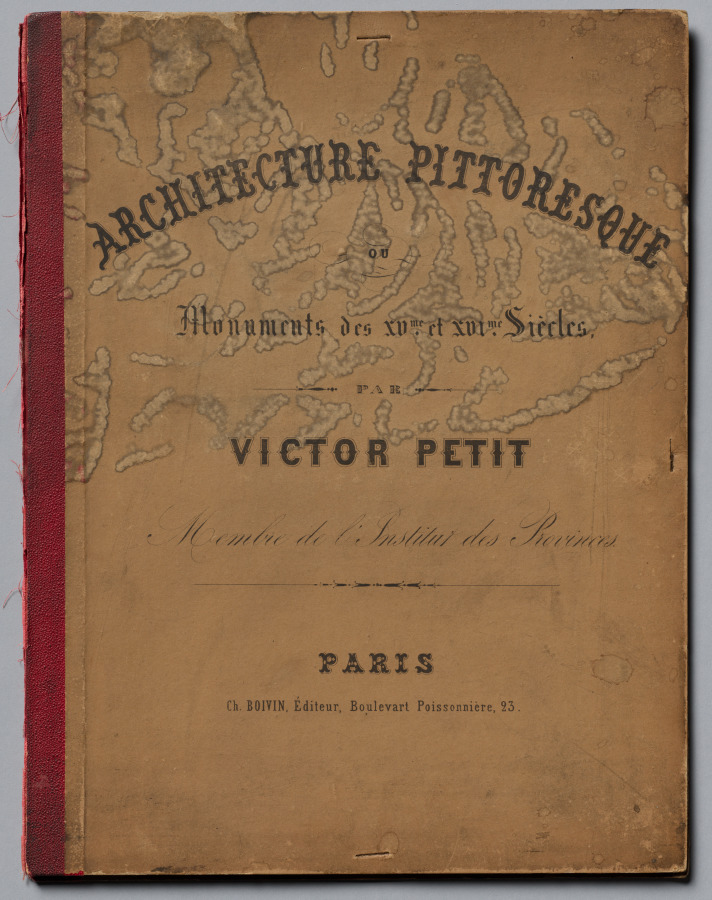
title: Architecture Pittoresque ou Monuments des XVeme. Et XVIeme. Siecles: Chateaux De France des XV et XVI Siecles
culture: France, 19th century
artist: Victor Petit (French, 1817–1874)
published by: Charles Boivin (publisher and editor); Lith de Godard a Paris (printer)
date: published 1860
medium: portfolio of 100 lithographs with tint stone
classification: Portfolio